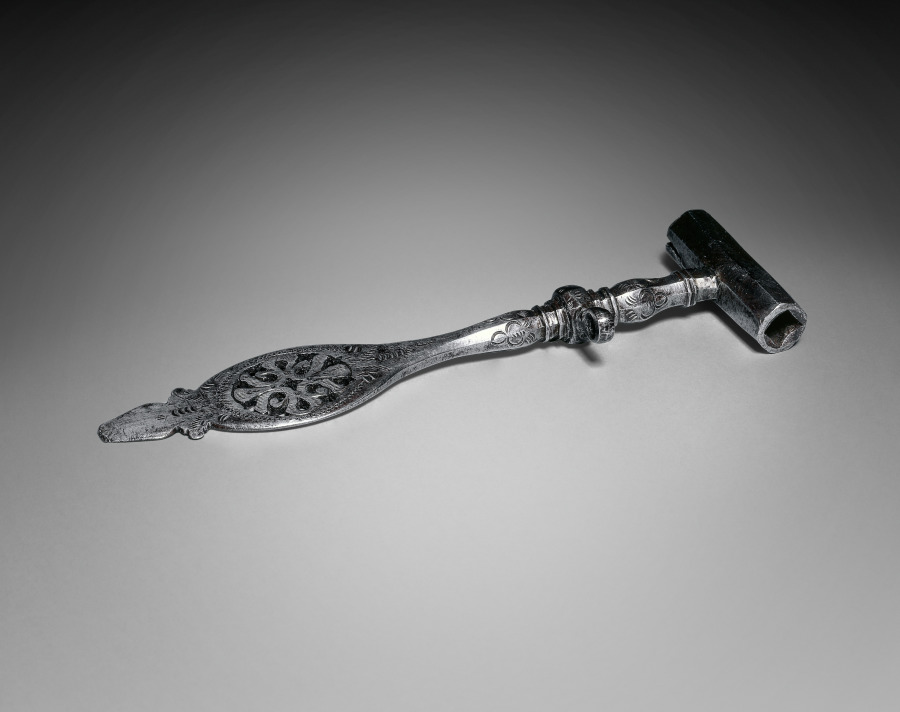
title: Spanner for a Wheel-Lock Gun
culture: Germany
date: c. 1600–1650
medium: steel, with punched, engraved, and pierced decoration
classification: Arms and Armor